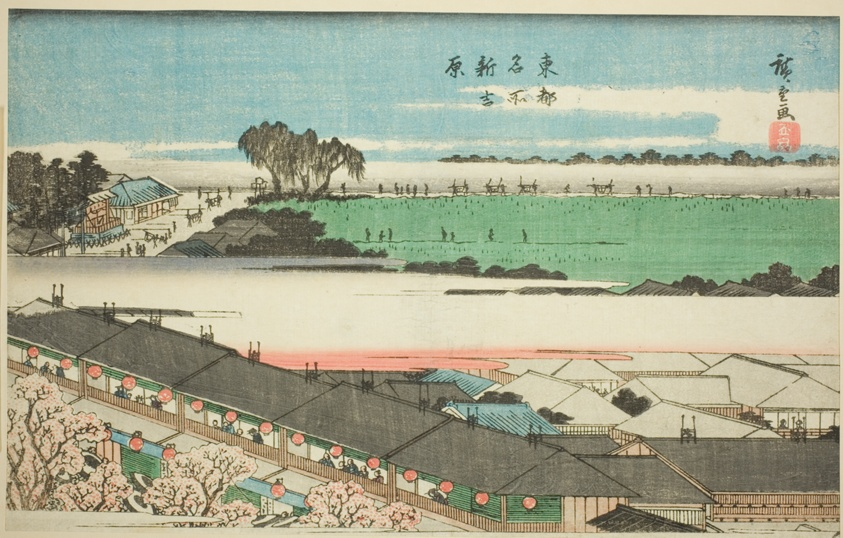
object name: Print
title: The New Yoshiwara (Shin Yoshiwara), from the series "Famous Places in the Eastern Capital (Toto meisho)"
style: Japanese (culture or style)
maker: Utagawa Hiroshige 歌川 広重; Japanese, 1797-1858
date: c. 1839/42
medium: Color woodblock print; oban, trimmed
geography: Japan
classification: woodblock print; print; asian art